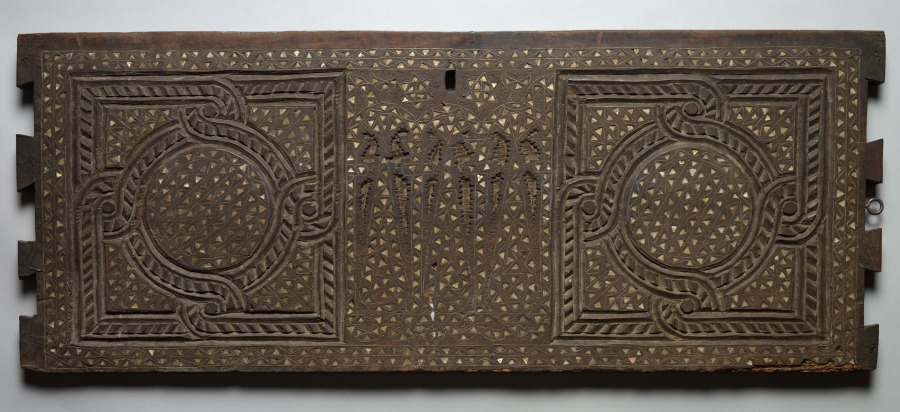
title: Chest Front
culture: India or Syria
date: 1700s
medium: wood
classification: Wood